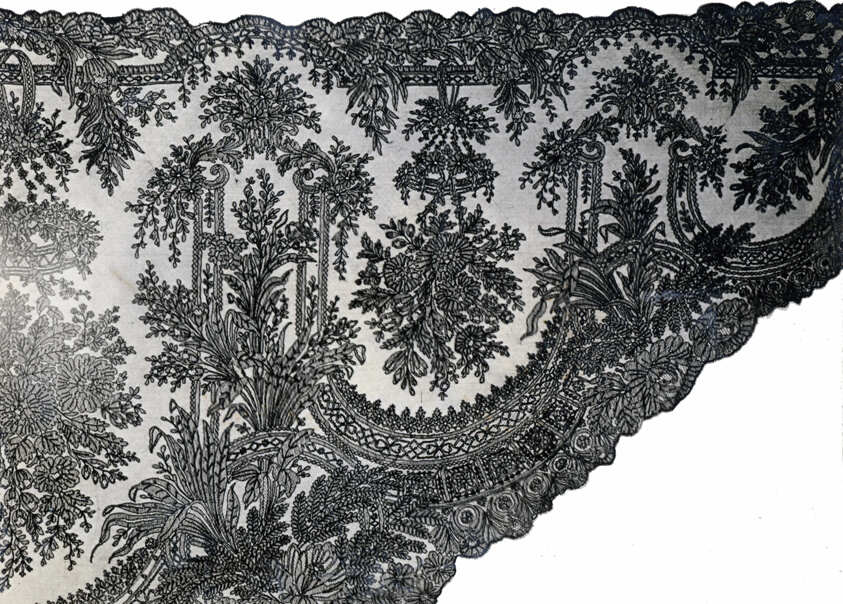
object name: Textile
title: Half Shawl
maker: France or England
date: 1865/75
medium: Silk, Pusher machine lace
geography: England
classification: textile; lace - machine